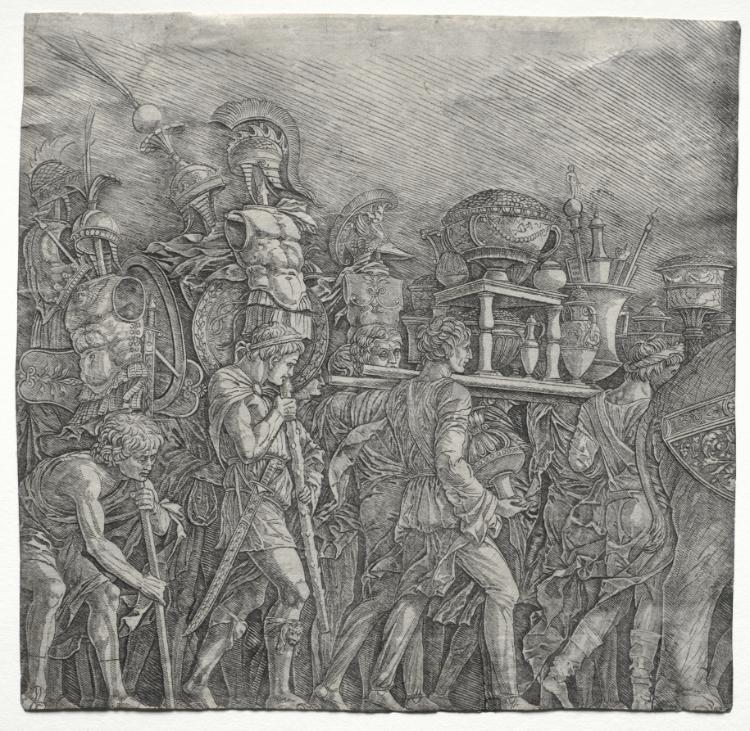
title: The Triumphs of Caesar: The Corselet Bearers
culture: Italy, 15th century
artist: school of Andrea Mantegna (Italian, about 1431–1506)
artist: probably by Premier Engraver (Italian, active about 1500)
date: c. 1495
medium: engraving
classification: Print